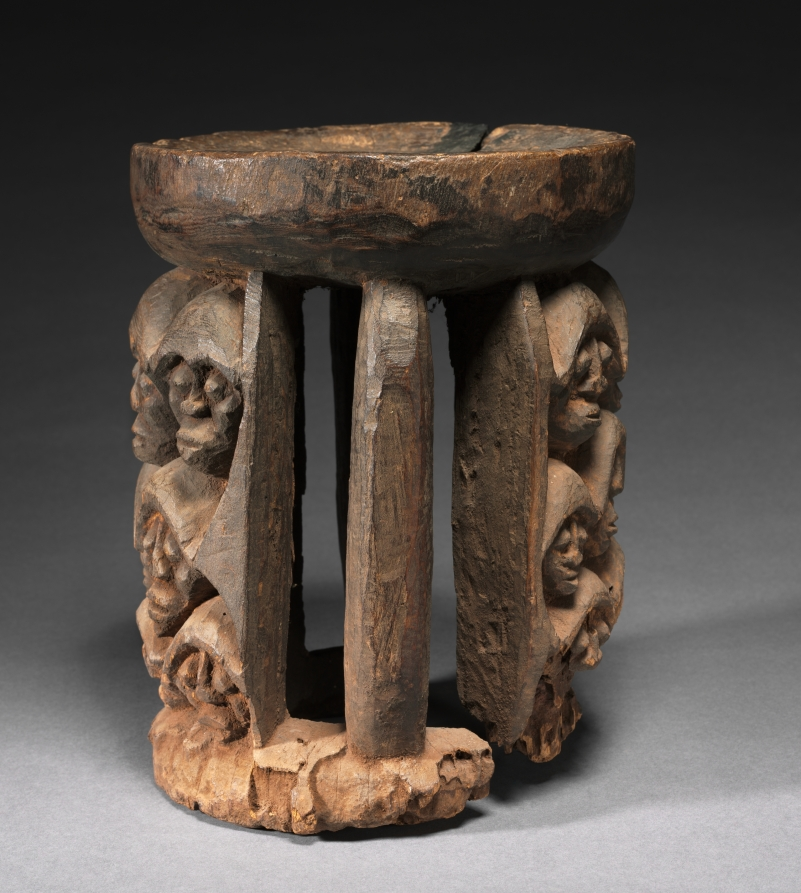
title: Stool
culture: Africa, Central Africa, Cameroon, unknown maker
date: c. 1910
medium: Wood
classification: Furniture and woodwork